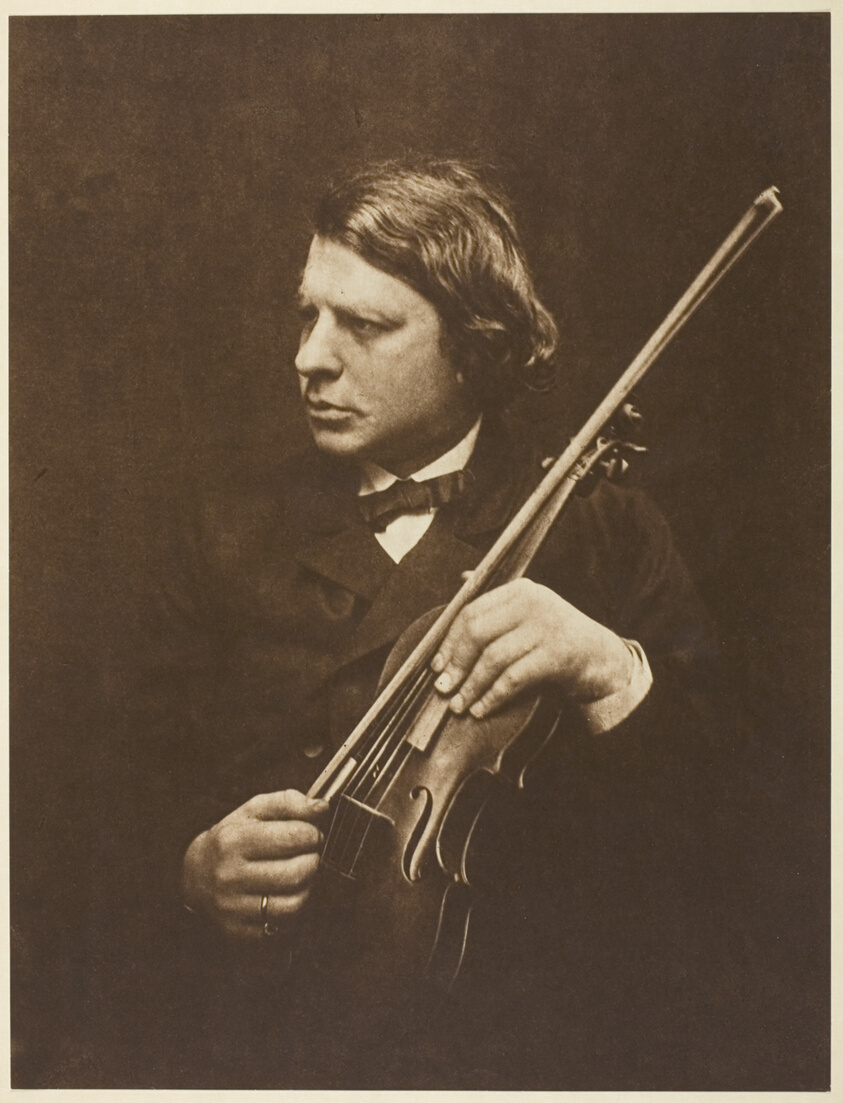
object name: Photograph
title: Herr Joseph Joachim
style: 19th century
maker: Julia Margaret Cameron (English, 1815–1879)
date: 1868, printed 1875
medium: Carbon print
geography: England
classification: carbon print; pigment process; photographic process; photography; photograph